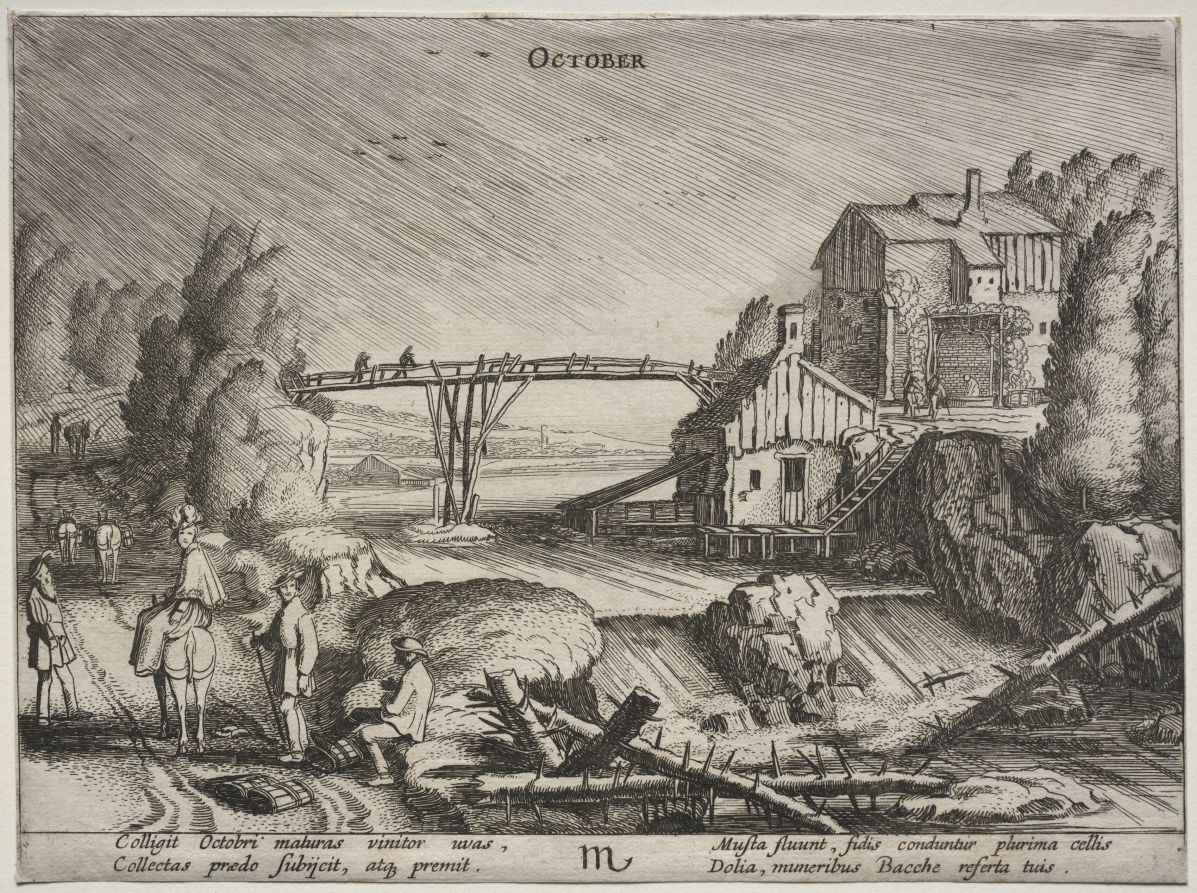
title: The Twelve Months: October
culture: Netherlands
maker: Jan van de Velde II (Dutch, 1593–1641)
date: 1608–18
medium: etching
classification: Print